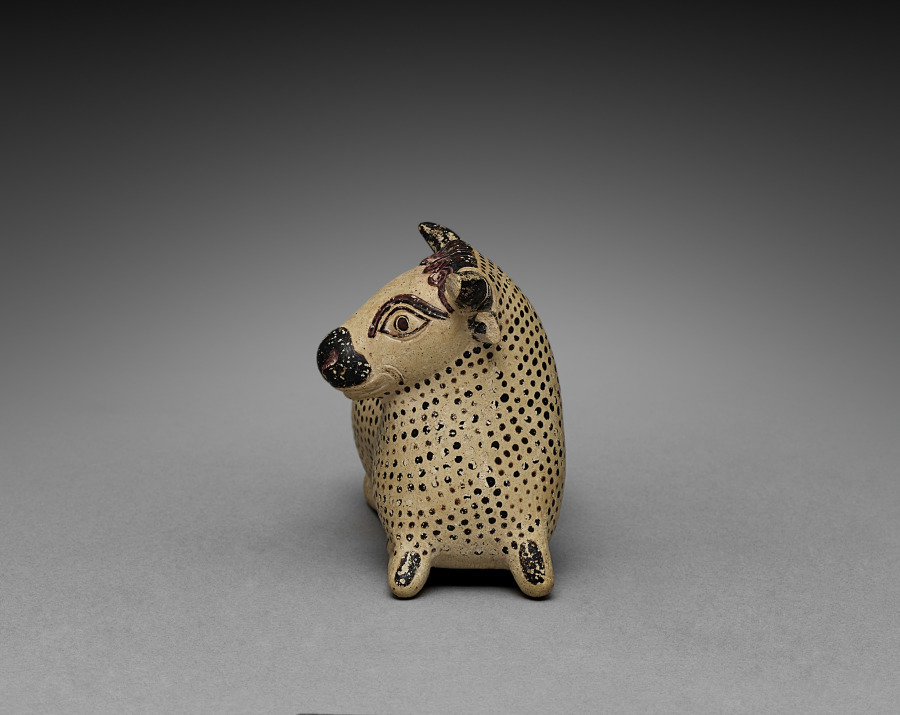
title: Oil Flask in the Shape of a Bull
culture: Greek, Corinthian or modern forgery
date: 600–575 BCE or 1900s CE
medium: ceramic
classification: Ceramic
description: This small bull-shaped flask is similar in form and painted decoration to a class of figure-shaped perfume vessels created during the late seventh and early sixth centuries BC in Greece and Italy (especially Corinth, Rhodes, and Etruria). The stippled body decoration characterizes such vases from multiple sites, while the light-colored clay and inconspicuous orifice placement are typical of Corinth. But no other reclining bulls are known among such vases (and only a few bullheads or upper bodies), raising questions about authenticity. A 1986 analysis determined that this object had been recently fired, and a 2020 clay analysis placed its origin in the Catalonia region of Spain, far from any known ancient production area for such flasks.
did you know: The curled tail masks a filling hole atop the back.